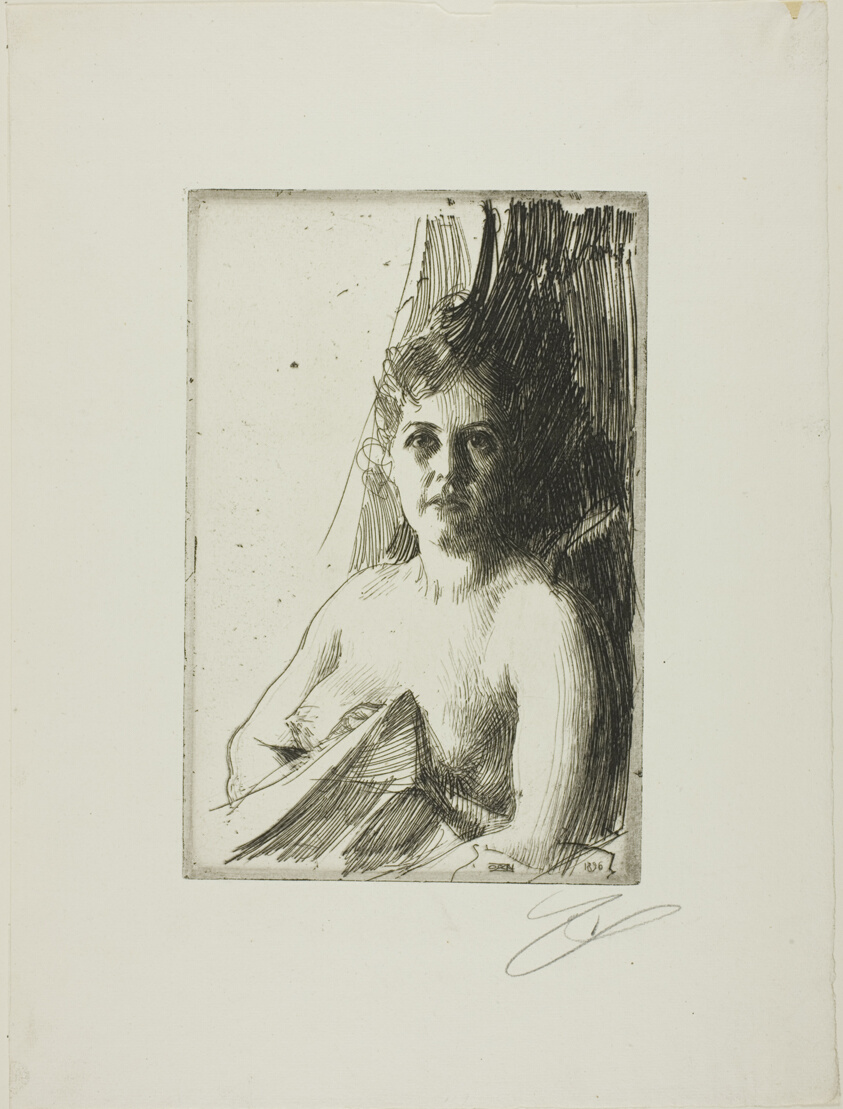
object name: Print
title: Nude Study III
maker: Anders Zorn (Swedish, 1860-1920)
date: 1896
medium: Etching on ivory laid paper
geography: Sweden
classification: etching; print; prints and drawing